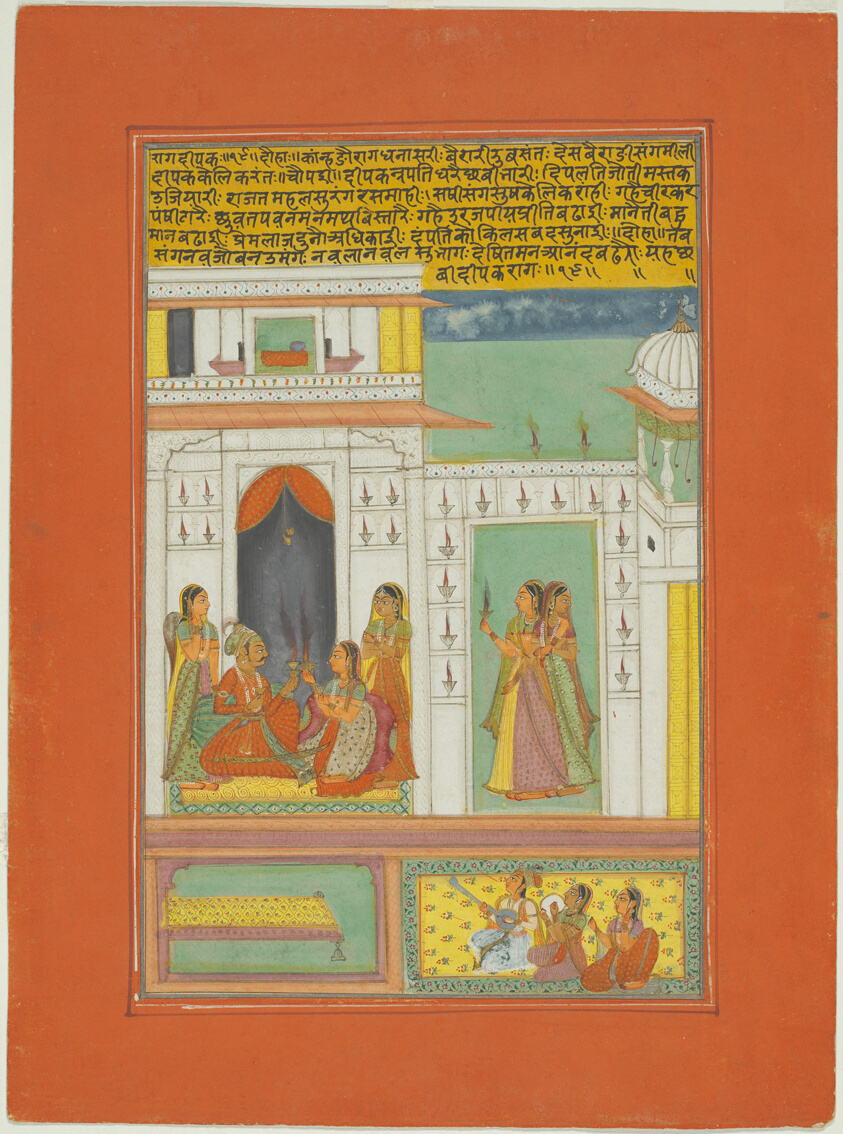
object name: Painting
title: Raga Dipak, Page from a Jaipur Ragamala Set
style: South Asian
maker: India; Rajasthan, Jaipur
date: c. 1750-1770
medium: Opaque watercolor on paper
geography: Rajasthan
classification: miniature painting; painting; asian art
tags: music, musicians